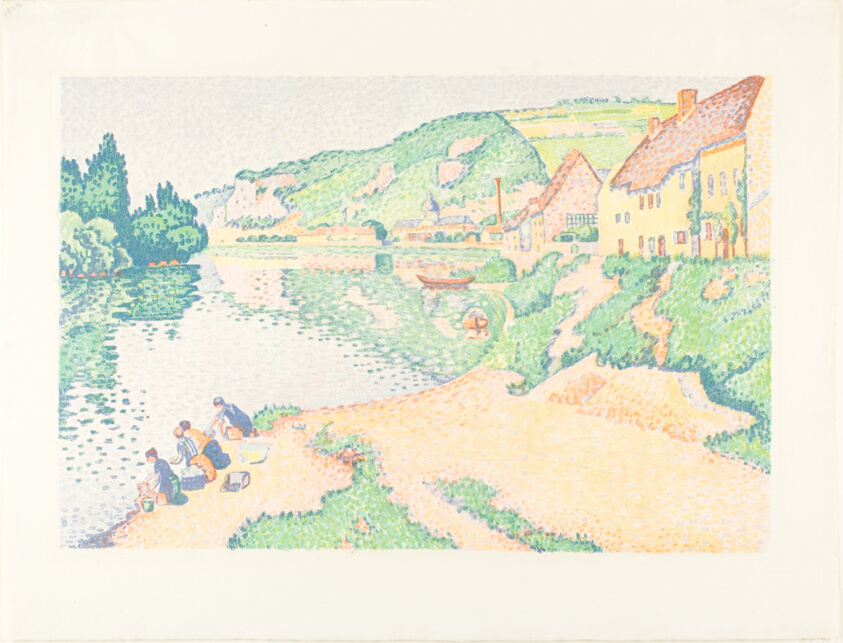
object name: Print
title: The Andelys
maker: Paul Signac (French, 1863-1935); printed by Auguste Clot (French, 1858-1936)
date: 1895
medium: Lithograph in pink, blue-gray, blue, green, dark green, yellow and orange on ivory wove paper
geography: France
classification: lithograph; print; prints and drawing